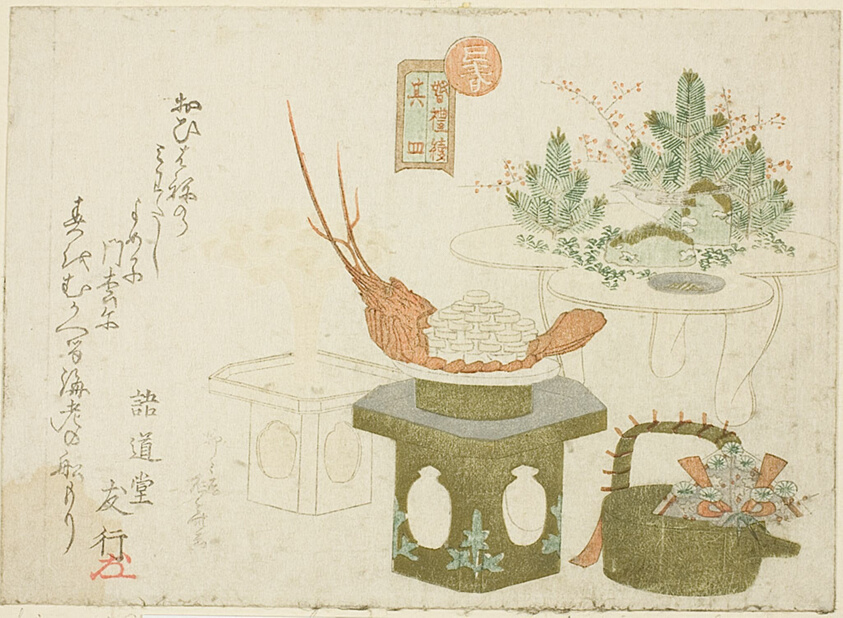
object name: Print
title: New Year's Decorations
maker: Ryuryukyo Shinsai (Japanese, c. 1764-1820)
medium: Color woodblock print; surimono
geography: Japan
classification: woodblock print; print; asian art